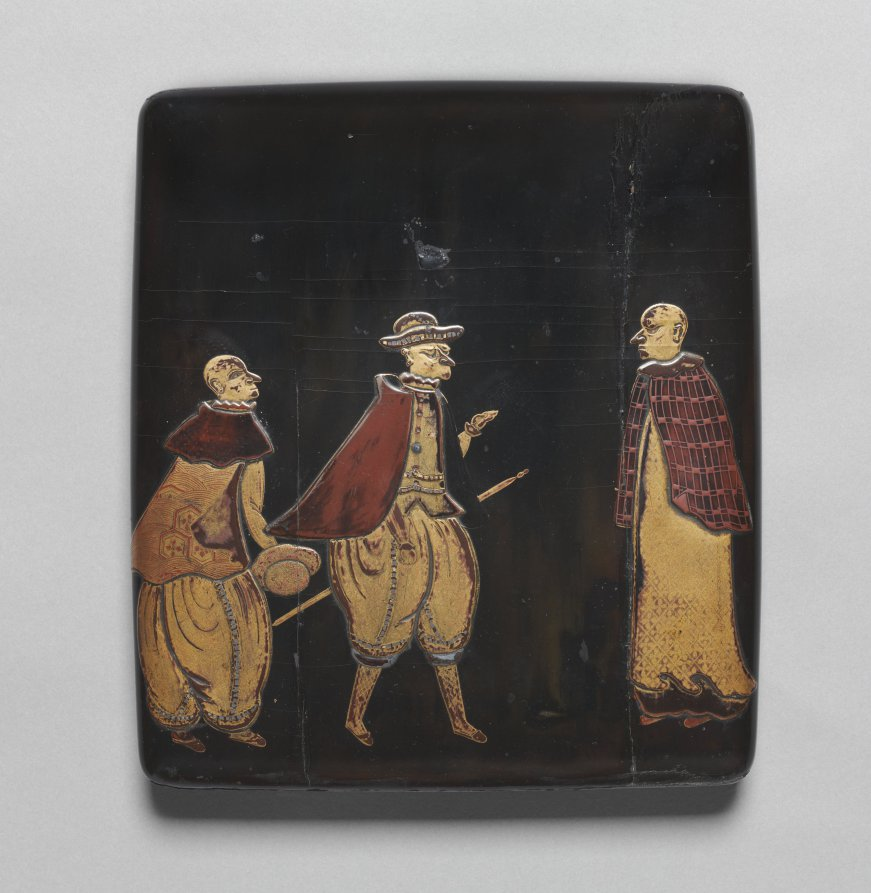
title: Writing Box (Suzuribako) with Europeans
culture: Japan, Edo period (1615–1868)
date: 1800s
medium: lacquered wood with gold maki-e, silver inlay and red lacquer on black ground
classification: Lacquer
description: The two people on the left of this box lid's design are Portuguese traders, identifiable by their balloon-shaped pants. Facing them is a Jesuit priest in a long robe. Portuguese ships arrived in Japan in the 1540s. Imagery first made to document the appearance of the foreigners survived as decoration on later objects like this one.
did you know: The Japanese term nanban 南蛮 is used to describe designs like the one on this box.